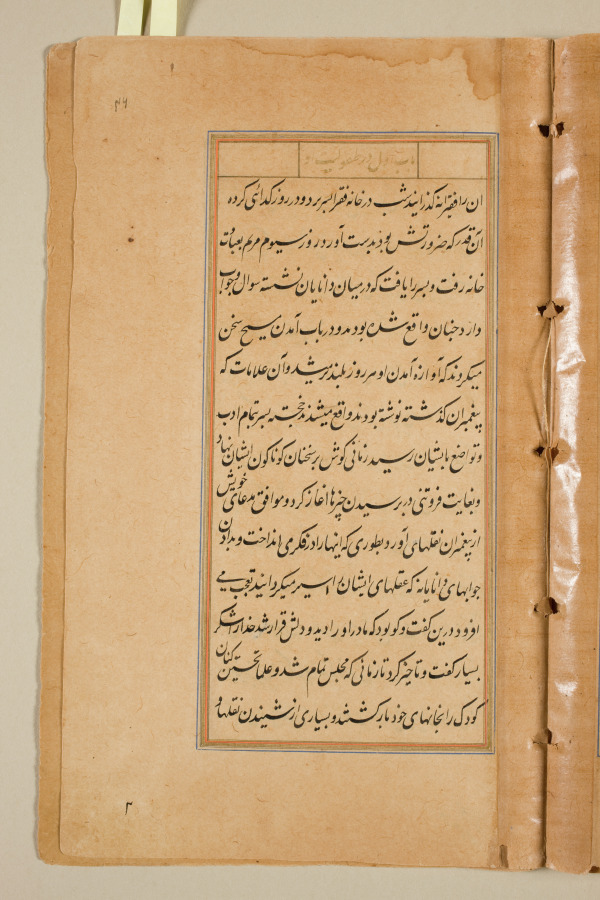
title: Text page from a Mirror of Holiness (Mir’at al-quds) of Father Jerome Xavier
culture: Mughal India, Allahabad, made for Prince Salim (1569–1627)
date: 1602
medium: Ink and gold on paper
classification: Manuscript